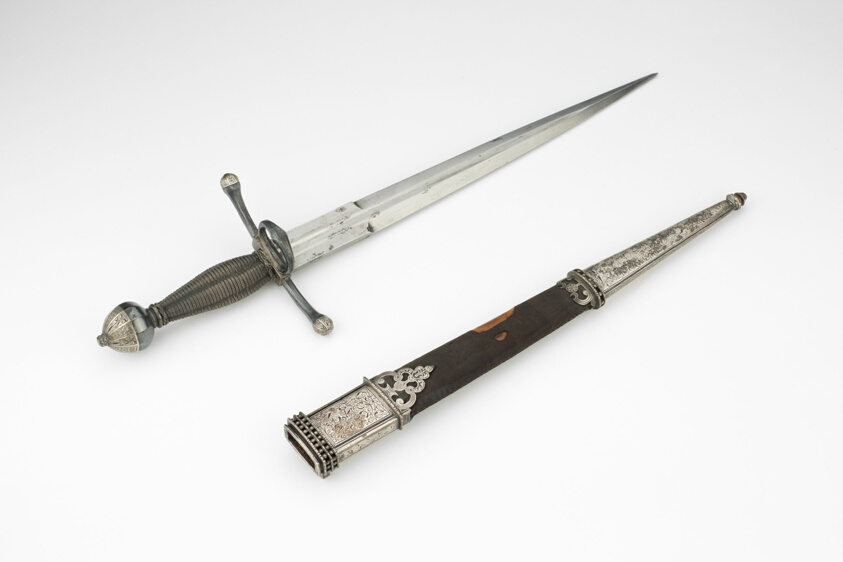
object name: Arms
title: Parrying Dagger with Scabbard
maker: German; Dresden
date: 1590/1600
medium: Steel, silver, and wood; silvered hilt and silver-mounted scabbard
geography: Dresden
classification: edged weapon-dagger; arms; arms and armor